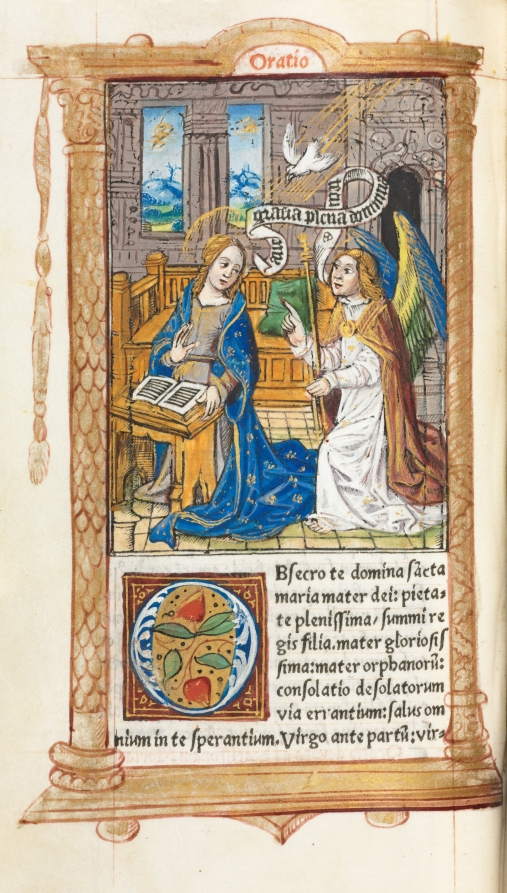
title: Printed Book of Hours (Use of Rome): fol. 60v, The Annunciation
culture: France, Paris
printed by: Guillaume Le Rouge (French, Paris, active 1493–1517)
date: 1510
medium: 112 Printed folios on parchment, bound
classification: Bound Volume